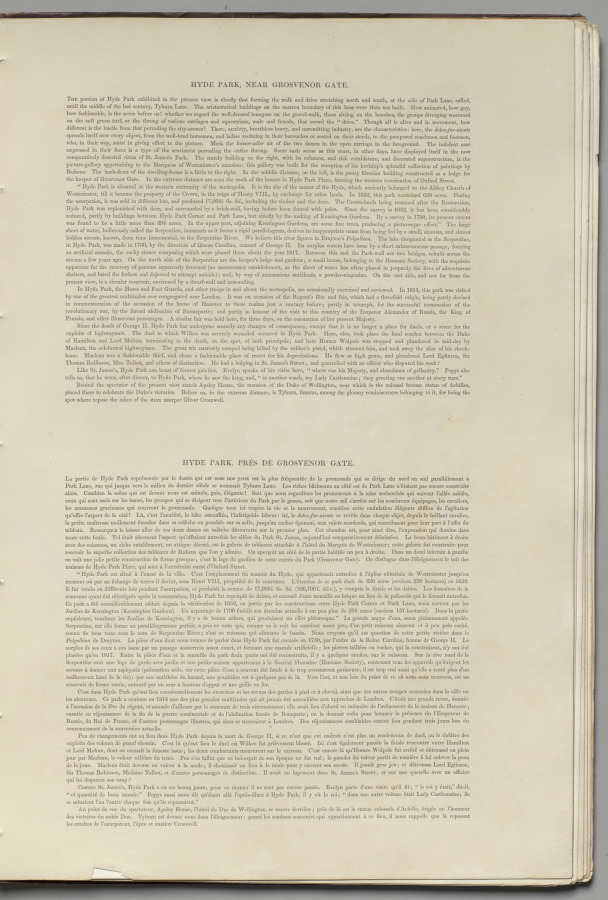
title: London As It Is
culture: England, 19th century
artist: Thomas Shotter Boys (British, 1803–1874)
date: 1842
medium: lithograph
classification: Bound Volume